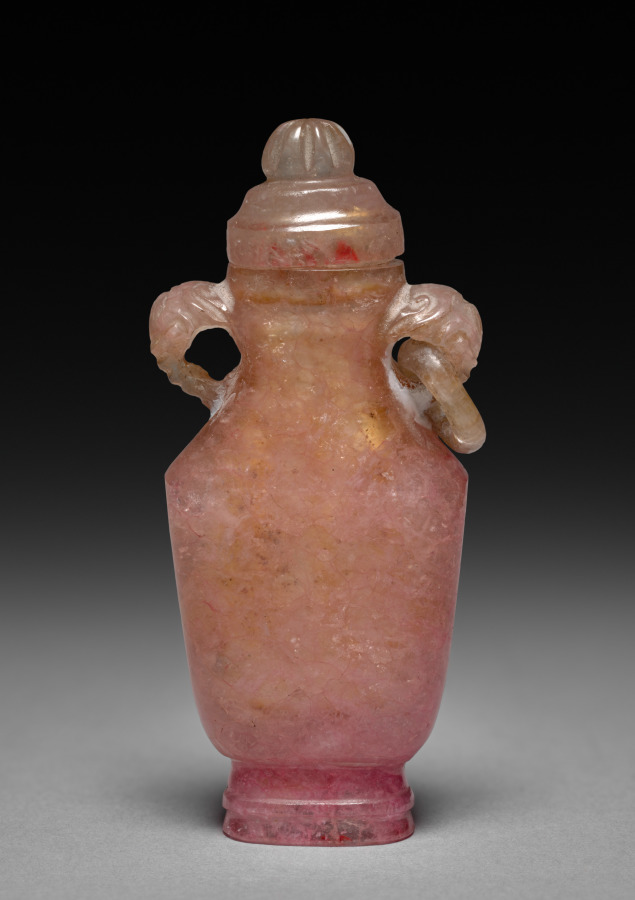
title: Miniature Jar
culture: China, Qing dynasty (1644-1911)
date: 19th-early 20th century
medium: jade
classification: Jade